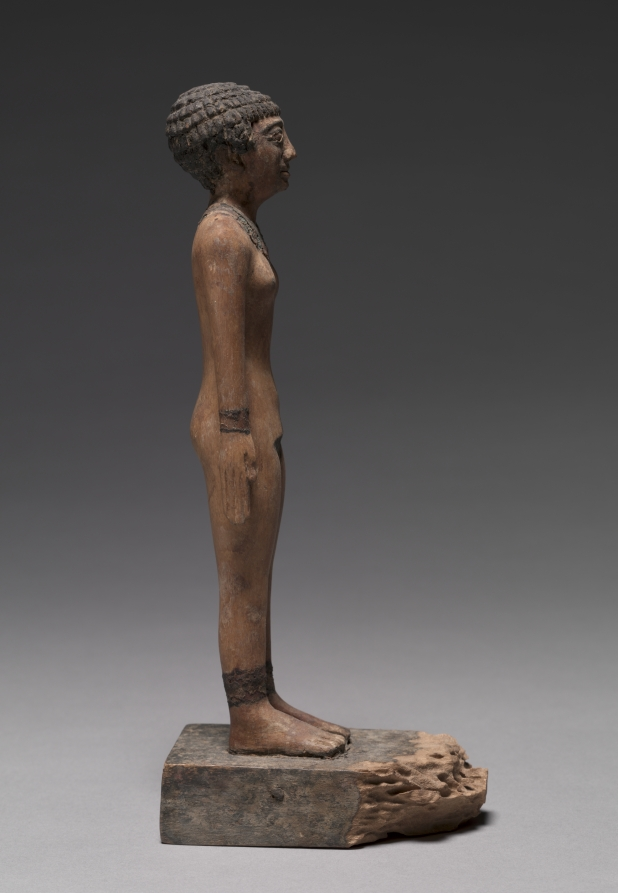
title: Female Statuette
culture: Egypt, Middle Kingdom (2040–1648 BCE), Dynasties 11–12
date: c. 2040–1859 BCE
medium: painted wood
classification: Wood